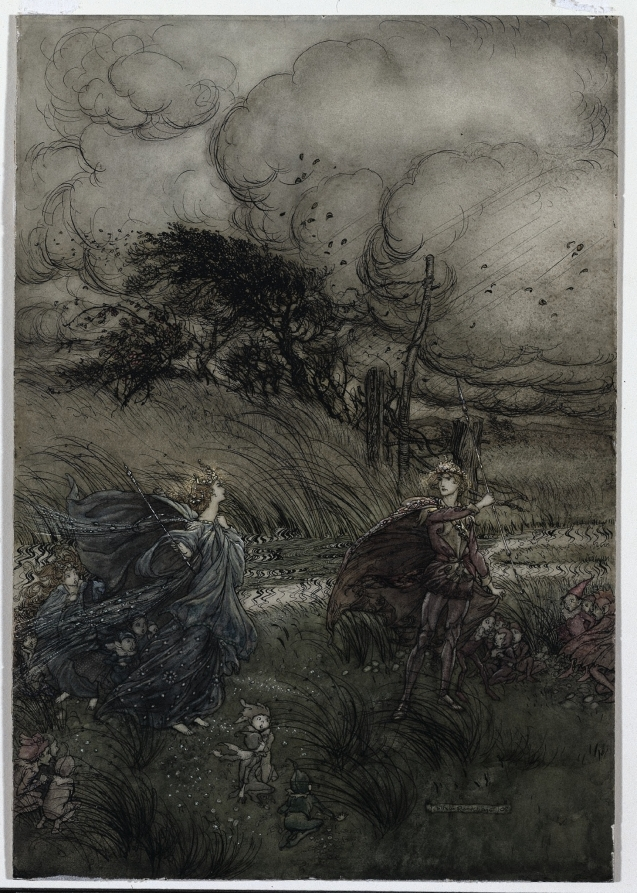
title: And Now They Never Meet in Grove or Green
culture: England, 20th century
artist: Arthur Rackham (British, 1867–1939)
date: 1908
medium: pen and black ink and watercolor with scraping and minute touches of white gouache on artist's illustration board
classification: Drawing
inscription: signed and dated, in pen and black ink, at lower right: Arthur Rackham 08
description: This drawing is one of 40 made by Arthur Rackham to illustrate William Shakespeare's comedy A Midsummer Night's Dream. It depicts the confrontation between Oberon and Titania, king and queen of the fairies, that takes place in the woods outside of Athens in act 2, scene 1. The artist painted a stormy sky looming over the magical couple to echo the story's mood. Rackham worked during a golden age of book illustration in England, around the turn of the 20th century, and the images he produced for literary works influenced future productions of Shakespeare's work.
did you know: Arthur Rackham was one of the first book illustrators to take advantage of color halftone printing, augmenting his ink drawings with subtle washes of transparent hues.